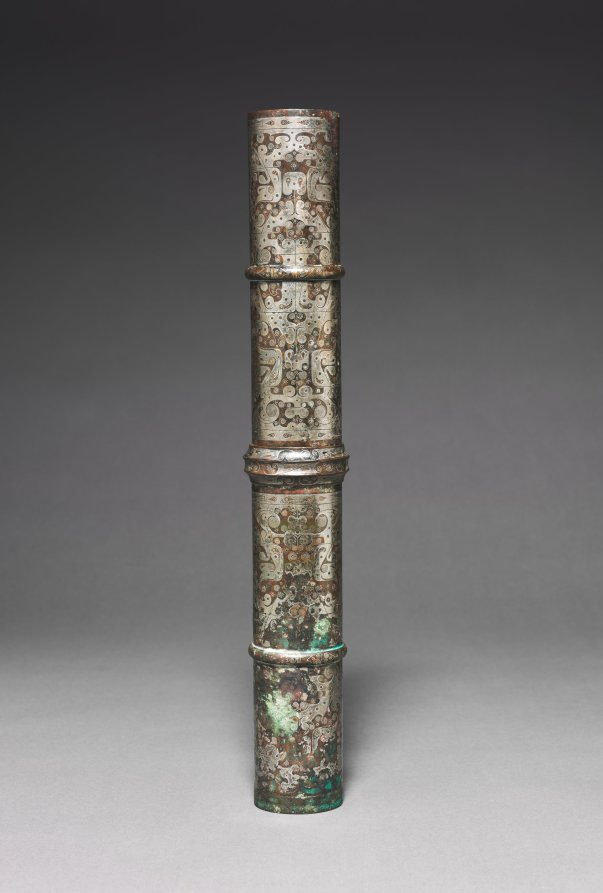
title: Chariot Canopy Shaft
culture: China, Western Han dynasty (206 BCE–8 CE)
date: 202 BCE–9 CE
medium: bronze inlaid with silver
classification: Metalwork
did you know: This bronze object decorated with inlaid silver was part of the structure that held a canopy aloft on a chariot.